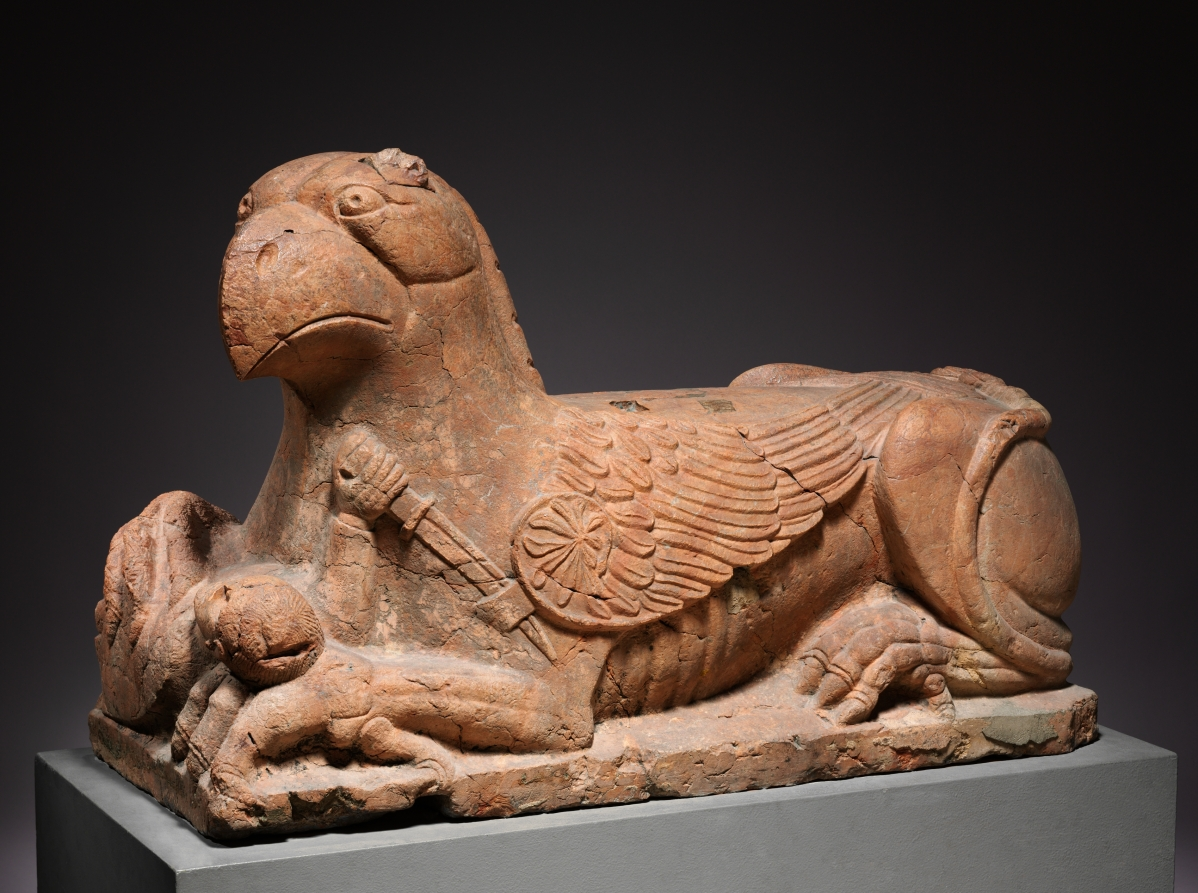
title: Guardian Griffin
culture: Northern Italy, Emilia, 12th century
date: 1150–1175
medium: pink limestone (called "Verona Marble")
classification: Sculpture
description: Griffins are fabled creatures that have the characteristics of an eagle and a lion--combining watchfulness and courage. In Christian art, the dual nature of the griffin was often used to signify that of Christ himself: divine (bird) and human (animal). Griffins were often used as guardian figures in church sculpture and were placed in portals and choir screens. The creatures seen here, with their inward-turning heads, were certainly used for such a purpose. When viewed from the front, one griffin may be seen protecting the figure of a knight between its paws, while the other griffin guards a calf. Their original function was probably to support the columns of a porch in front of a church doorway.